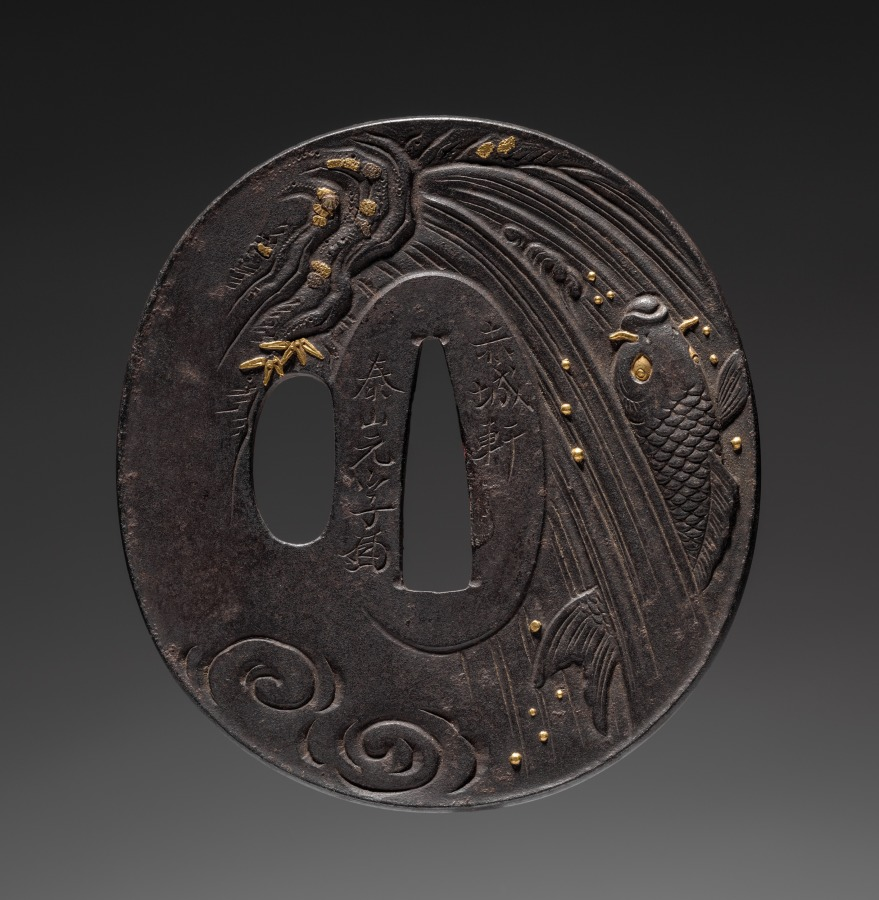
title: Sword Guard (Tsuba) with Carp in Waterfall and Bridge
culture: Japan, Edo period (1615–1868)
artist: Sekijoken Taizan Motozane (Japanese, 1740–1829)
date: c. 1760–1829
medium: iron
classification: Arms and Armor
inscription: Signature: Sekijoken Taizan Motozane